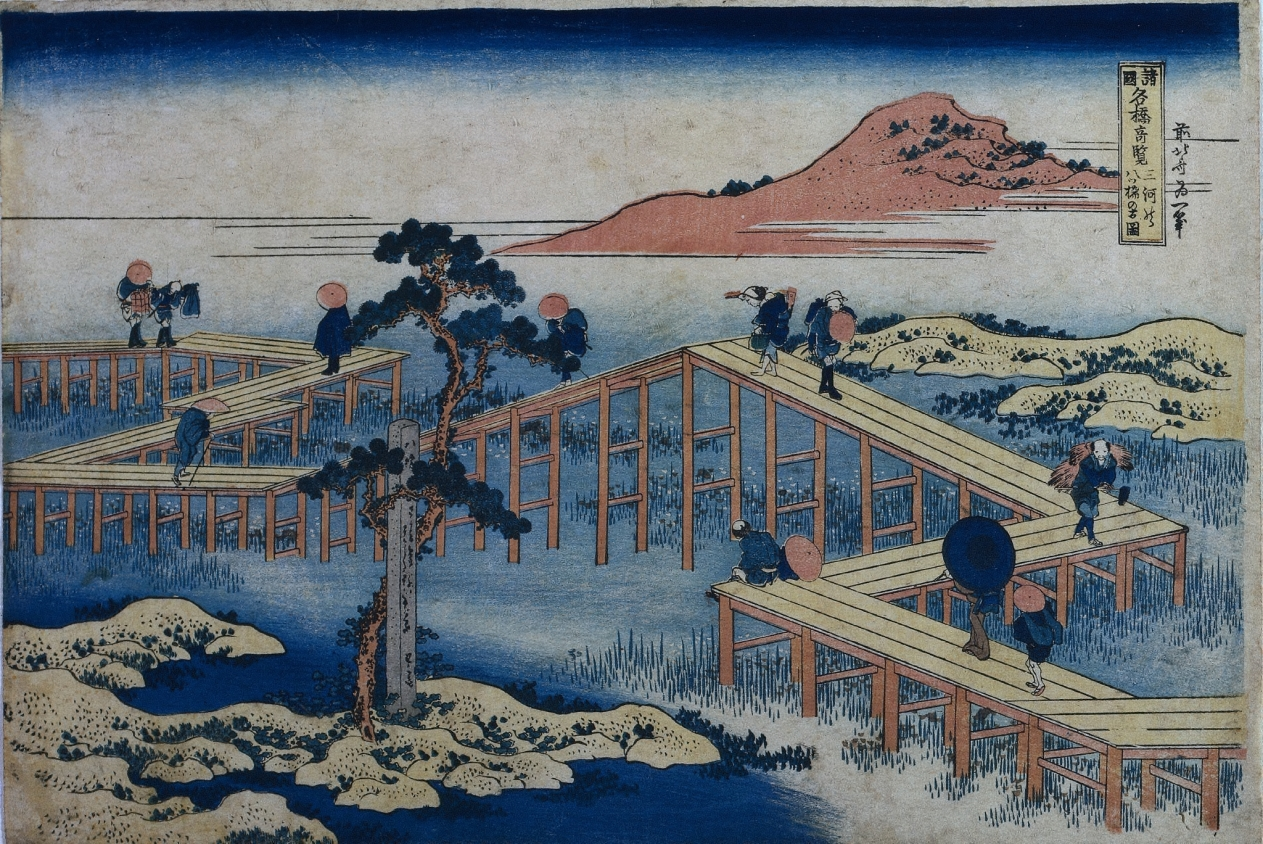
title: An Ancient Picture of the Eight Part Bridge in Mikawa Province (from the series Curious Views of Famous Bridges in the Provinces)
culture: Japan, Edo period (1615–1868)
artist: after Katsushika Hokusai (Japanese, 1760–1849)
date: early 1830s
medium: color woodblock print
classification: Print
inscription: Signature: Zen Hokusai Iitsu hitsu Publisher: Nishimuraya Yohachi